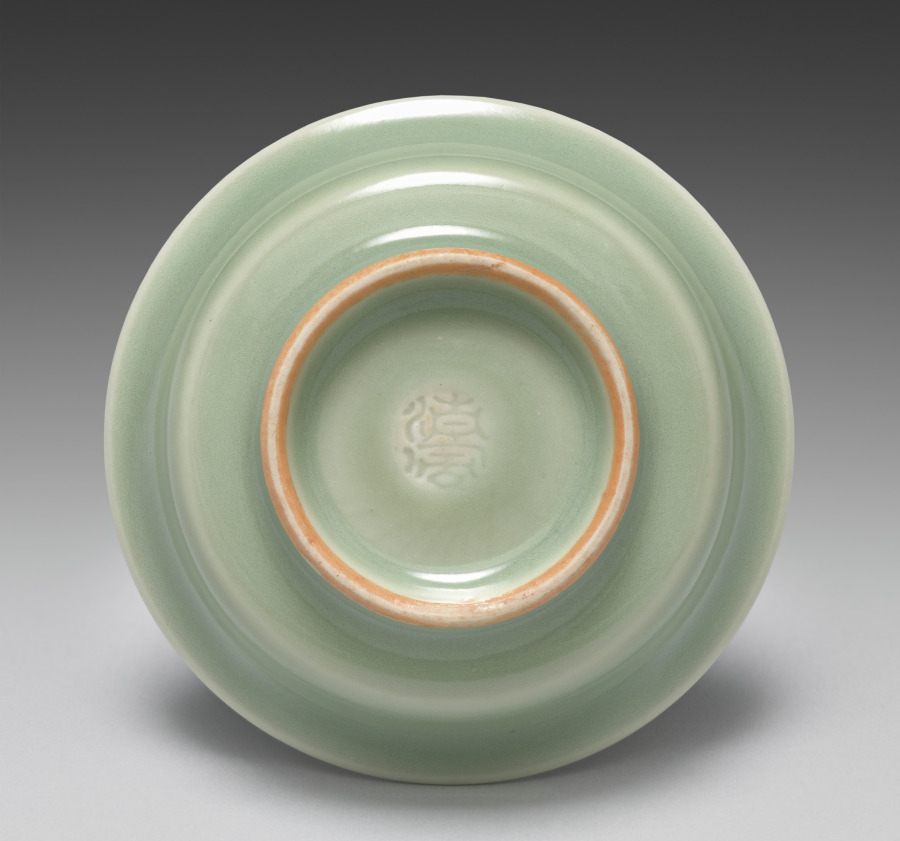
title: Saucer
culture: Japan, Meiji period (1868–1912)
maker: Seifū Yohei III (Japanese, 1851–1914)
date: 1893–1914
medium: One from a set of ten dishes; porcelain with green glaze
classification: Ceramic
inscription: 清風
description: Yohei III’s main output for his sophisticated clientele was in the form of tea sets and dining sets. He created a range of dishes in green glazes. He often produced in pairs, sets of five, or sets of ten. For this set of ten small dishes in a simple, round form that emphasizes the glaze above all, the box lid designates the piece as seiji, or green-glazed porcelain, using a general term for the extensive palette of green glazes often called celadon in English. The box lid further identifies the dishes themselves as tōchō, literally “bean-sized saucers,” a size that makes them suitable for dipping sauces.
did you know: The ten dishes in this set are stored in stacks of five in a two-compartment box.